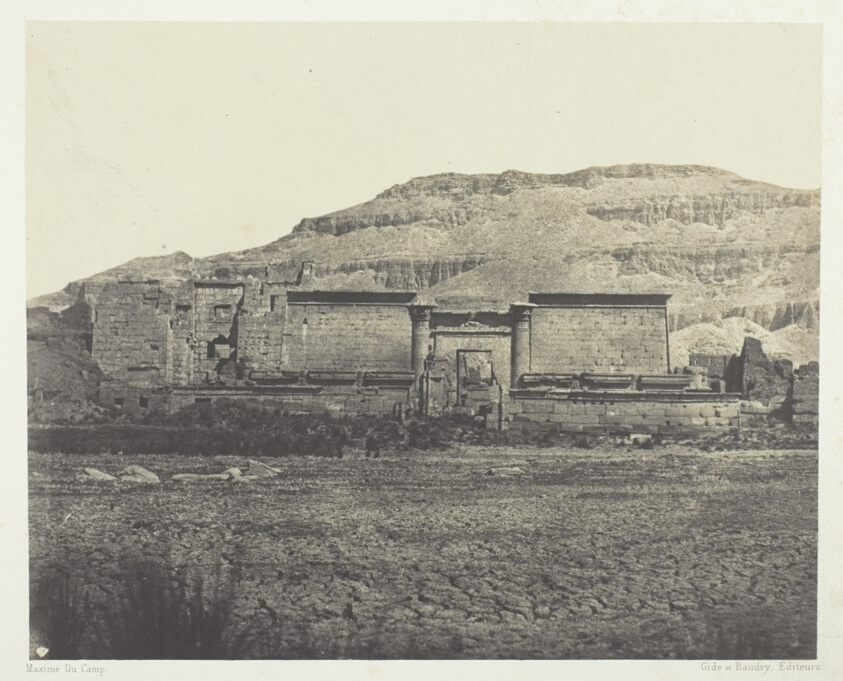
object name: Photograph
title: Médinet-Habou,Vue Générale des Rines, Thèbes, plate 45 from the album "Egypte, Nubie, Palestine et Syrie" (1852)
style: 19th century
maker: Maxime Du Camp (French, 1822–1894)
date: 1849/51, printed 1852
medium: Salted paper print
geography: France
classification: salted paper print; photographic process; photography; photograph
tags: Collected by Hugh Edwards, Egypte, Nubie, Palestine et Syrie